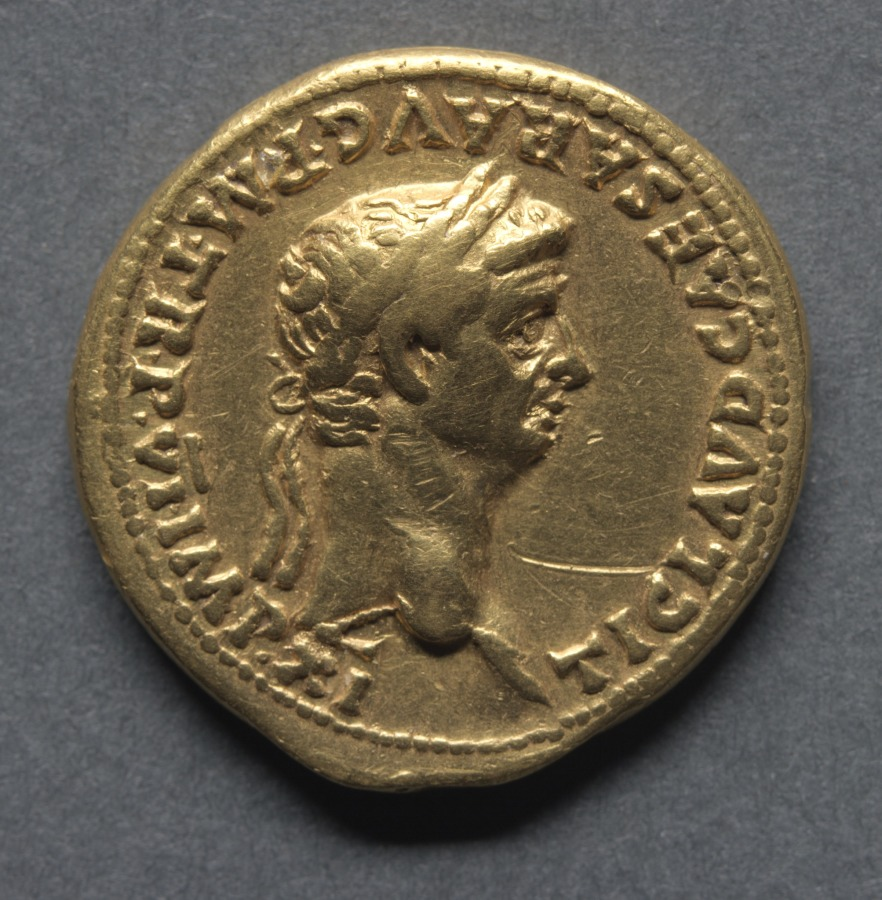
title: Aureus: Bust of Claudius I (obverse); Triumphal Arch with Equestrian Statue and Trophies (reverse)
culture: England, Roman, Claudius I (41–54 CE)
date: 47–48 CE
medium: gold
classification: Coins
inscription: TI. CLAVD. CAESAR. AVG. P. M. TR. P.. VI. IMP. XI.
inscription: De Britann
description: Minted in Rome, this coin depicts the triumphal arch erected there in 44 AD commemorating Claudius in the campaign in Britain. On top of the arch is the emperor seated on a horse between two military trophies. The arch itself was a converted aqueduct which crossed the main road leading north toward Rome. Claudius was the youngest of the three surviving children of Drusus and Antonia Minor and the first Roman emperor to have been born outside Rome.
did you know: During his reign, Claudius started the successful campaign for the conquest of Britain.